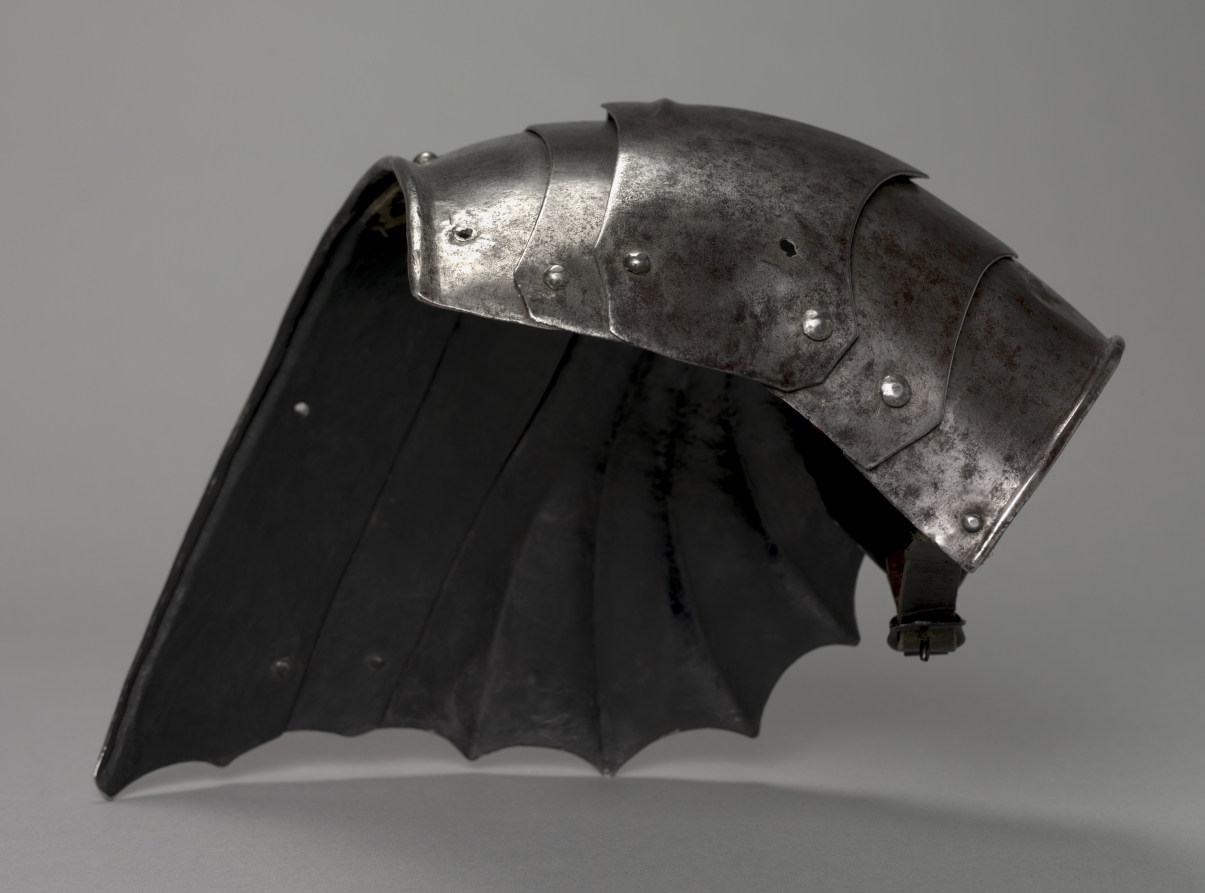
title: Gothic Fan-Shaped Pauldron (left)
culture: Italy, Milan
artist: Antonio Missaglia (Italian, 1416/17–1495/96)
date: c.1485–1500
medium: steel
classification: Arms and Armor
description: When the elements that made up a suit of armor had been forged, shaped, and polished, they were inspected for fit and finish. At this stage the master armorer would use a punch to stamp each element with his maker's mark. Other associated marks might include a town or guild mark, depending on the city of origin. The set of three marks shown here are of a type known to be Milanese. The upper mark seems to show three letters beneath a crown, while the mark below, twice repeated, is a split cross with the letters inside. These probably refer to the Missaglias.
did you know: A pauldron is a component of plate armor that covers the shoulder and often the armpit, and parts of the back and chest as well.